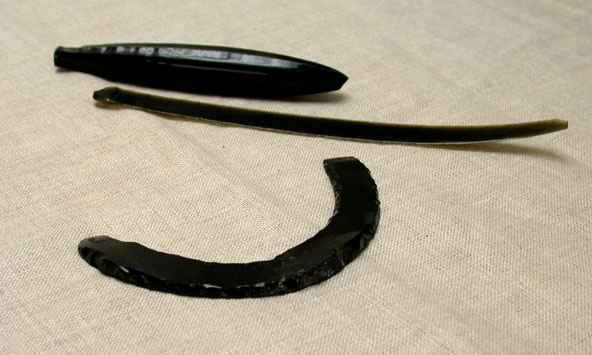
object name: Decorative Arts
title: Obsidian Core, Blade, and Curved Neckpiece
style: colima, jalisco, mesoamerican, Arts of the Americas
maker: Colima or Jalisco; Colima or Jalisco, Mexico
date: c. 300 CE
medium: Obsidian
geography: Mexico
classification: obisidian; american decorative arts; costume accessory worn above the waist; blade (stone tool); art of the americas; decorative arts